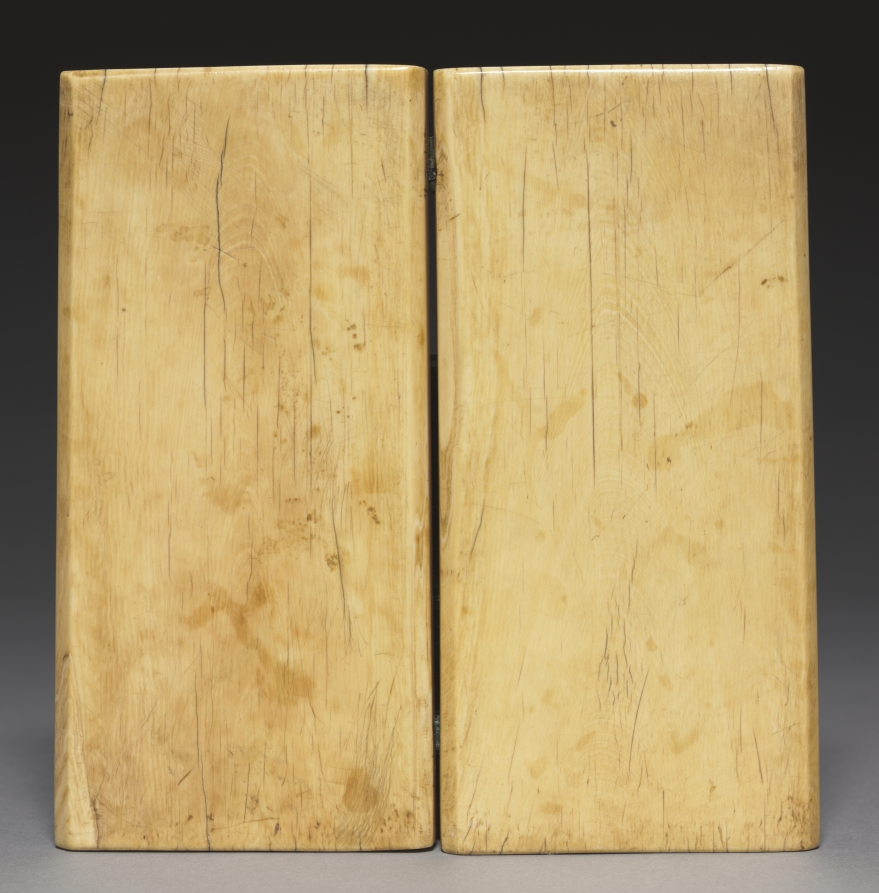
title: Diptych: Scenes from the Passion and Afterlife of Christ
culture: France, Gothic period, 14th century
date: c. 1330–1350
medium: ivory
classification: Ivory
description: The four scenes represented on this ivory diptych are Christ’s Flagellation and Crucifixion on the left panel and Christ’s Resurrection and Appearance to Mary Magdalene (Noli me tangere, or "Do not touch me"). Ivory diptychs like this one illustrating pivotal moments in the story of Christ’s Passion and resurrection served as powerful tools in the devotional practices of elite members of society during the later Middle Ages.